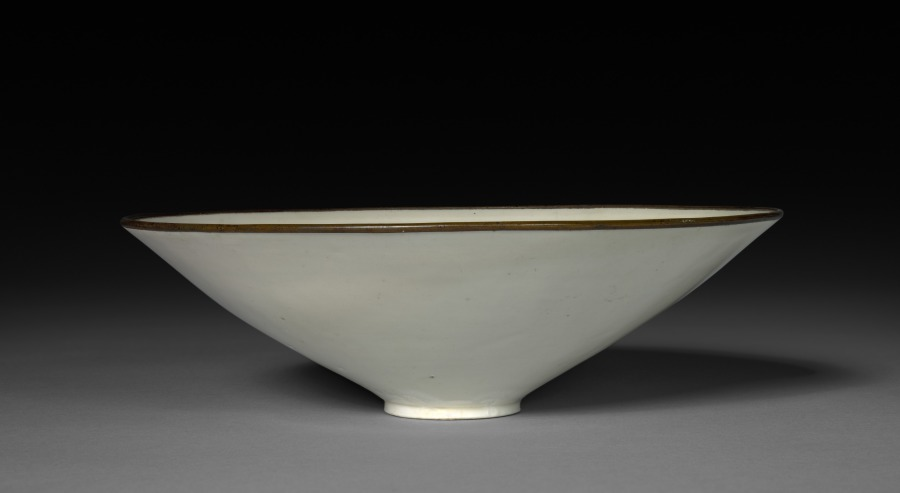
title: Bowl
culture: China, Hebei province, Chuyang District, Jin dynasty (1115-1234)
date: 12th Century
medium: White porcelain, Ding ware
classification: Ceramic